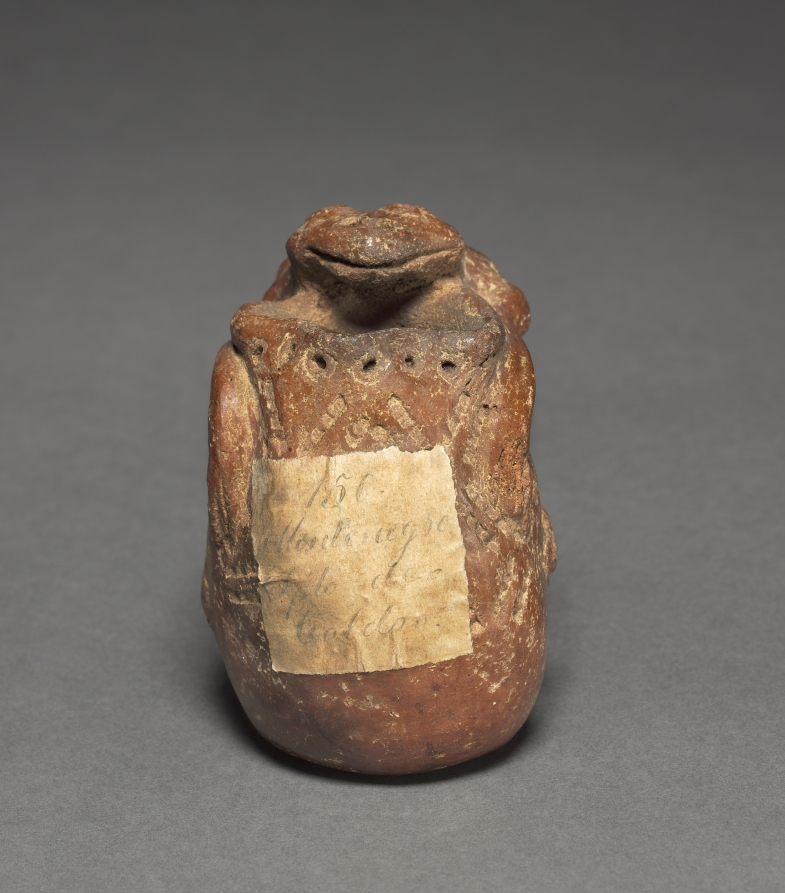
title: Jar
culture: Colombia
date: before 1921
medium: red ware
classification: Ceramic